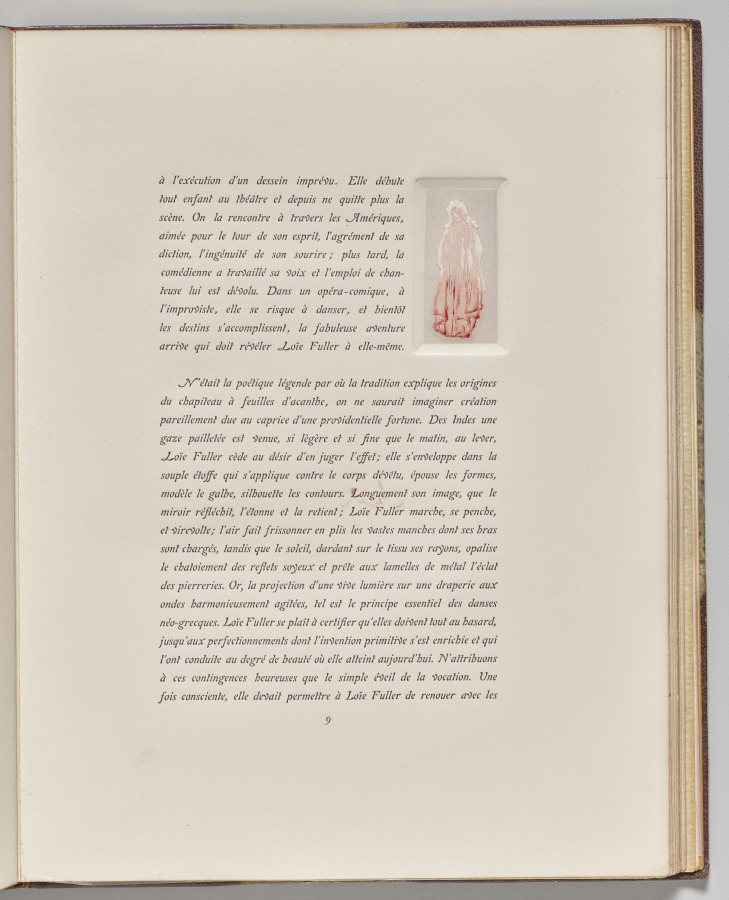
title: Small Standing Figure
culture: France, early 20th Century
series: La Loïe Fuller, by Roger Marx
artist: Pierre Roche (French, 1855–1922)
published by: Les Cents Bibliophiles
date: 1904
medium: gypsograph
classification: Bound Volume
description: Although best known as a sculptor, Roche was a versatile and prolific artist who worked in many mediums. Loïe Fuller, the pioneer of modern dance who took Paris by storm in 1892, was one of his favorite subjects. He portrayed her in clay, bronze, marble, plaster, and in a series of gypsographs that illustrated an essay by the art critic Roger Marx. The book was described as "a precious monument to Loïe Fuller."